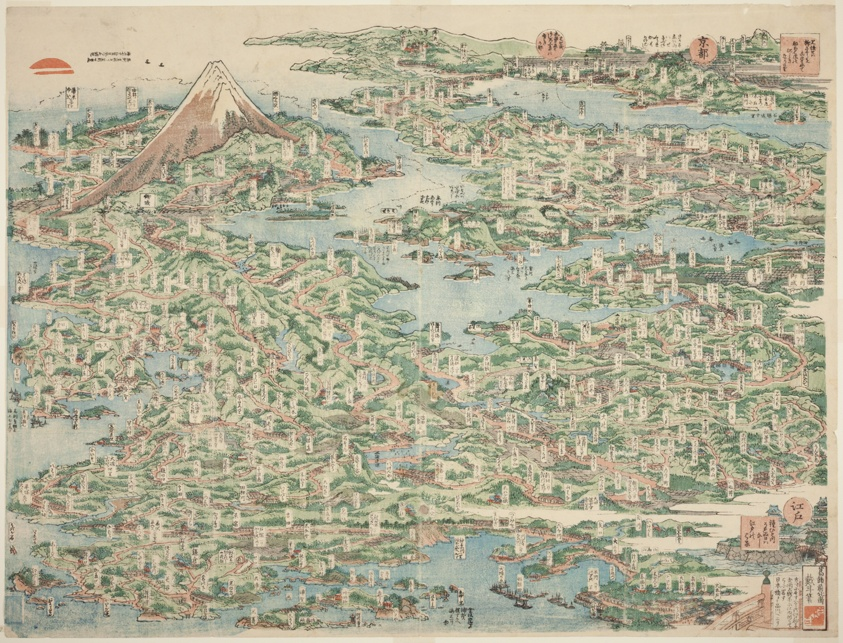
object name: Print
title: The Famous Places on the Tokaido in One View (Tokaido meisho ichiran)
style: Japanese (culture or style)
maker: Katsushika Hokusai 葛飾 北斎; Japanese, 1760-1849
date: 1818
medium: Color woodblock print; o-oban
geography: Japan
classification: woodblock print; print; asian art